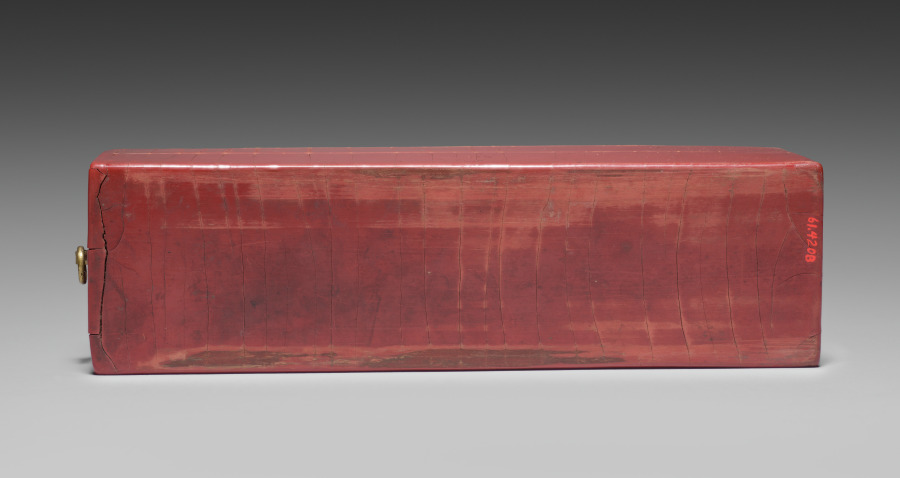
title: Drawer for a Tihong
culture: China, Ming dynasty (1368-1644), Wanli reign (1572-1620)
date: 1585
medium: carved cinnabar lacquer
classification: Lacquer